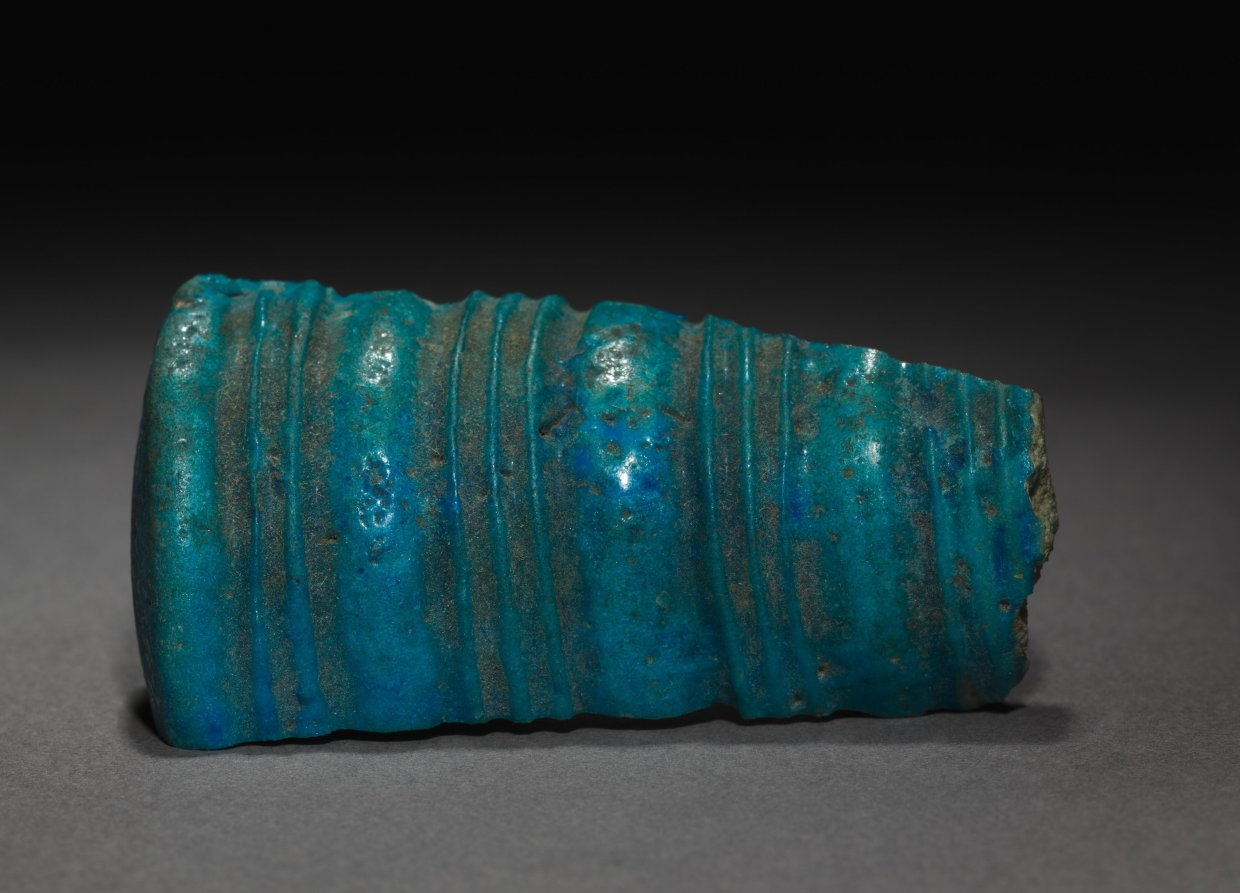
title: Fragment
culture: Egypt, New Kingdom (1540–1069 BCE), Dynasty 18, reign of Akhenaten (1351–1334 BCE)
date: 1353–1337 BCE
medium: turquoise faience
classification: Vessels